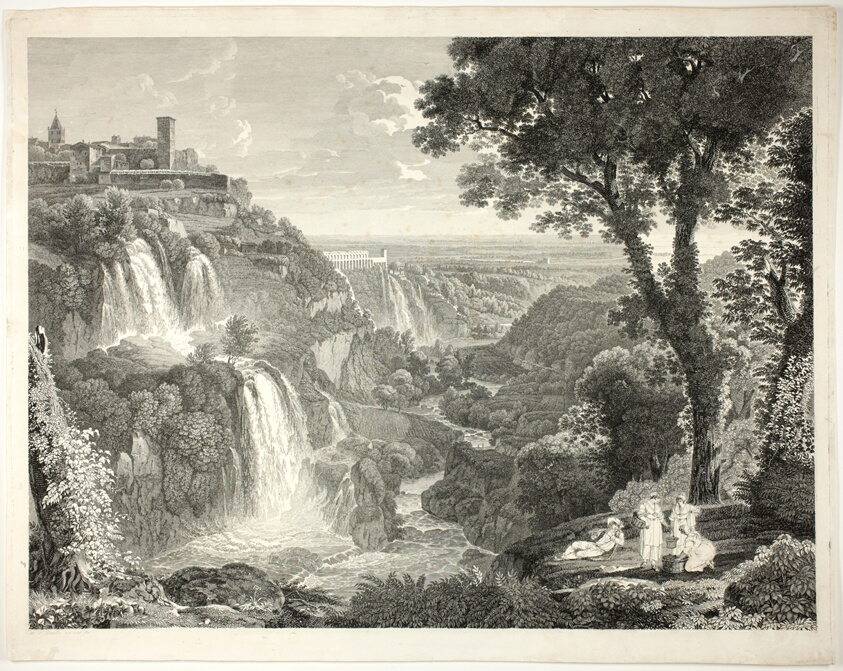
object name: Print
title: The Principal View of the Large and Small Cascades at Tivoli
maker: Friedrich Wilhelm Gmelin; German, 1760-1820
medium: Etching on off-white wove paper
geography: Germany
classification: etching; print; prints and drawing